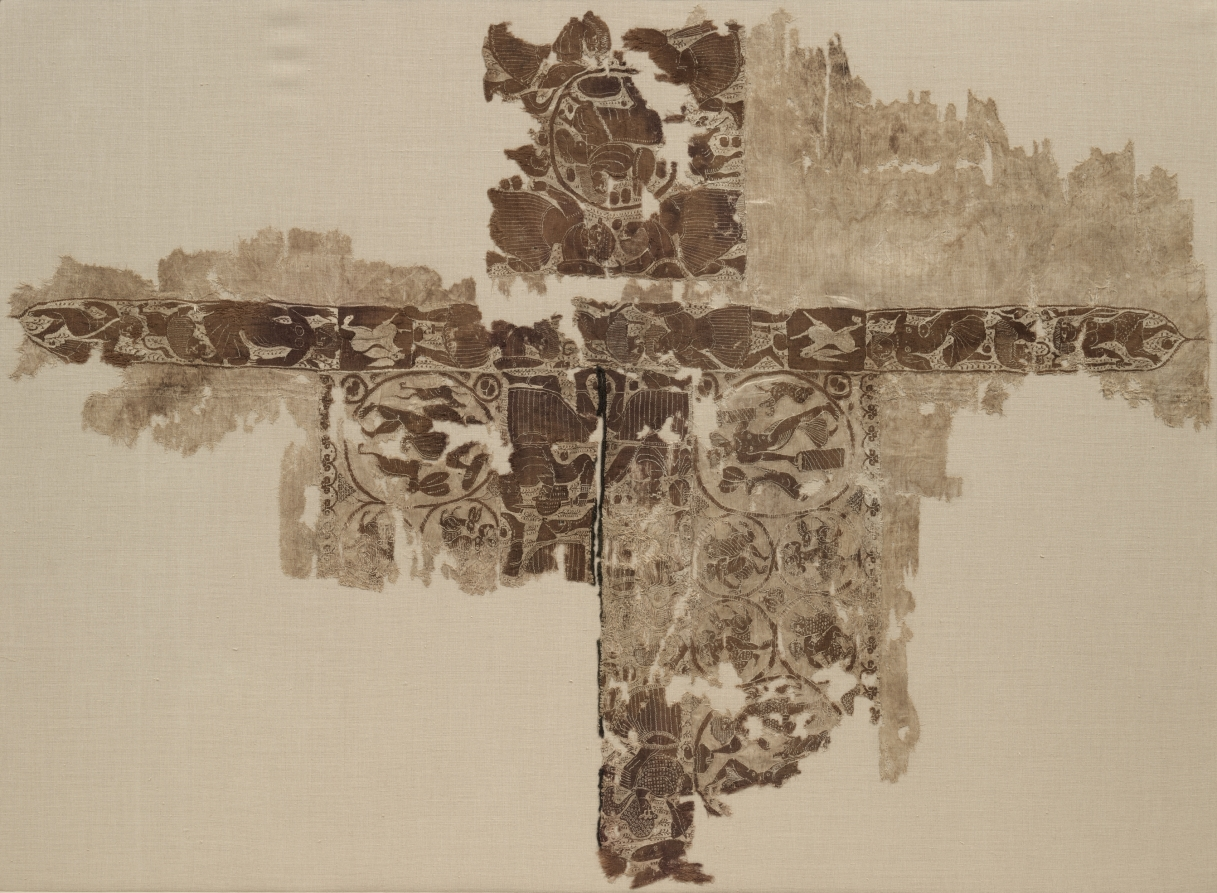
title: Fragment of a Tunic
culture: Egypt, 5th century, Byzantine period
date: 400s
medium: tabby weave with inwoven tapestry ornament: linen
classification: Textile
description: The quality of this finely woven decoration outweighs its fragmentary condition. The central horizontal neck opening, reinforced with a cord, is flanked by panels displaying warriors, hunters, dancers, lions, and rabbits. Some are standing upright, when viewed from the front and back of the tunic, and others appear to be “lying down.” In the shoulder square on the right, four kneeling hunters holding round shields are dressed in Roman-Byzantine military costume, which consists of a leather skirt, cloak over the shoulder, and high laced boots.